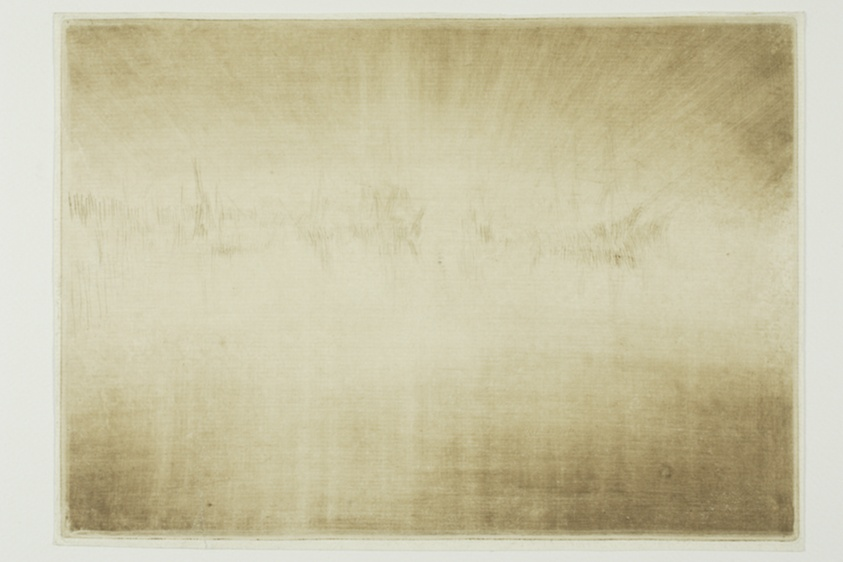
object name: Print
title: Nocturne: Shipping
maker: James McNeill Whistler (American, 1834-1903)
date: 1879/80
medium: Drypoint in dark brown ink on ivory laid paper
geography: United States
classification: drypoint; print; prints and drawing; paper